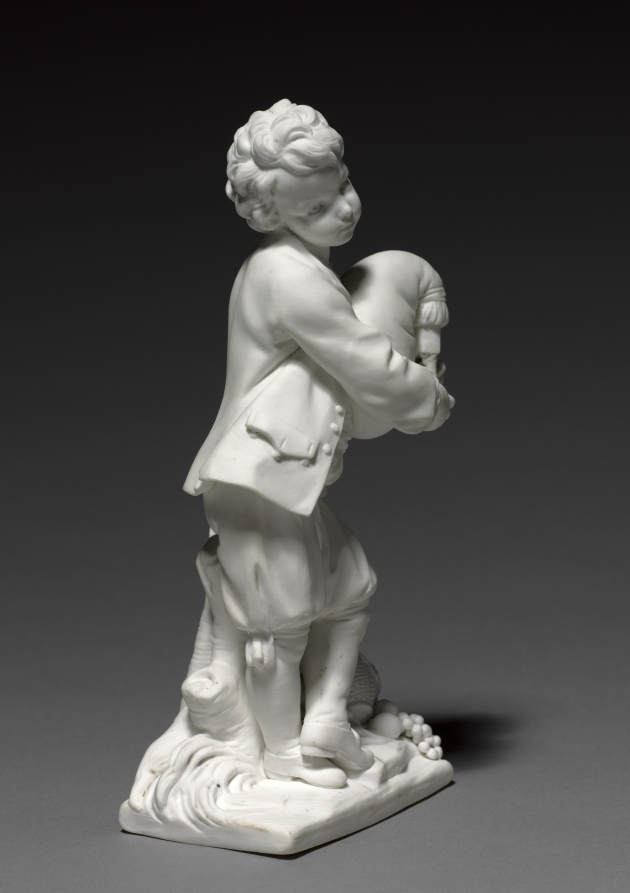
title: Figure of the Bagpiper (Le Joueur de musette)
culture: France, Vincennes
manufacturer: Vincennes Porcelain Factory (France, 1740–56)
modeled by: Pierre Blondeau (French)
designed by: François Boucher (French, 1703–1770)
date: 1748–52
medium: unglazed soft-paste porcelain (biscuit)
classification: Ceramic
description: Although a few Vincennes porcelain figures exist that are glazed, the royal factory adopted at an early date the practice of producing unglazed biscuit figures that, because of the purity of their material, resemble marble figurines. The fashion for biscuit figures first introduced at Vincennes quickly spread through Europe.